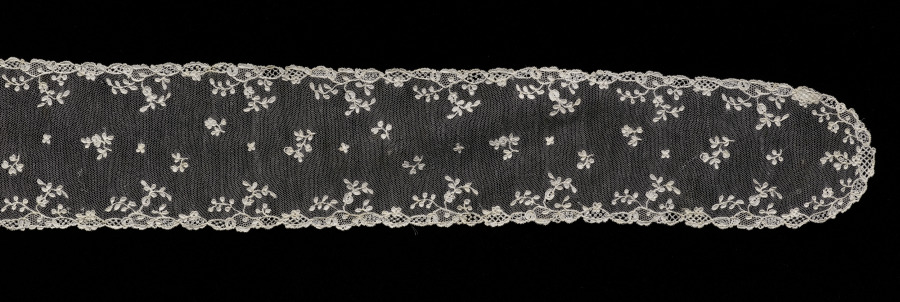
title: Pair of Lace Lappets, joined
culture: France, Alençon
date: 1774–92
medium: Linen: needle lace (Point d'Alençon)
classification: Lace